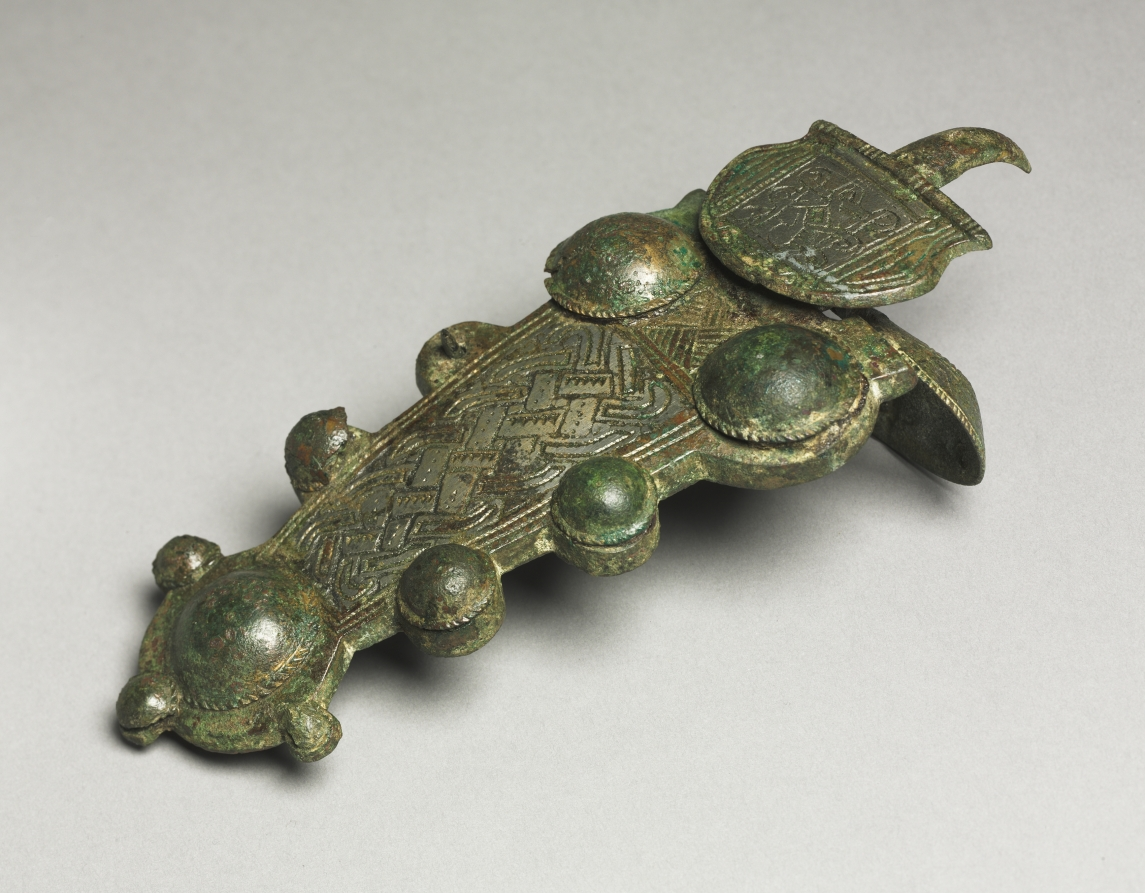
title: Buckle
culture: Frankish, Migration period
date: 600s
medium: bronze and silver overlay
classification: Jewelry